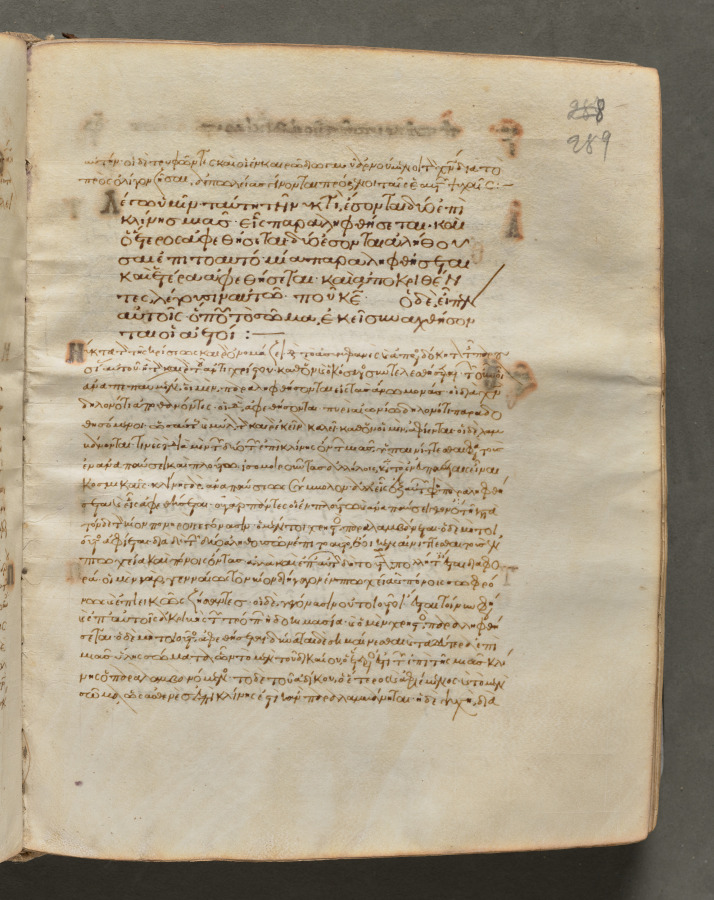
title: Text, folio 289 (recto), from a Gospel Book with Commentaries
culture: Byzantium, Constantinople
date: c. 1000–1100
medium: ink, tempera, and gold on vellum; leather binding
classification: Bound Volume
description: Each of the four gospels in this book opens on a page with brilliantly illuminated borders depicting the author of the text as well as birds—principally peacocks, symbols of the immortality of the soul—and fountains, representing the fountain of life and the salvation of the soul. This volume consists of 428 leaves with texts in Greek. Its level of sophistication suggests that it was probably written and decorated in a monastery in Constantinople.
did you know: Gospel books were carried in procession through Byzantine churches.